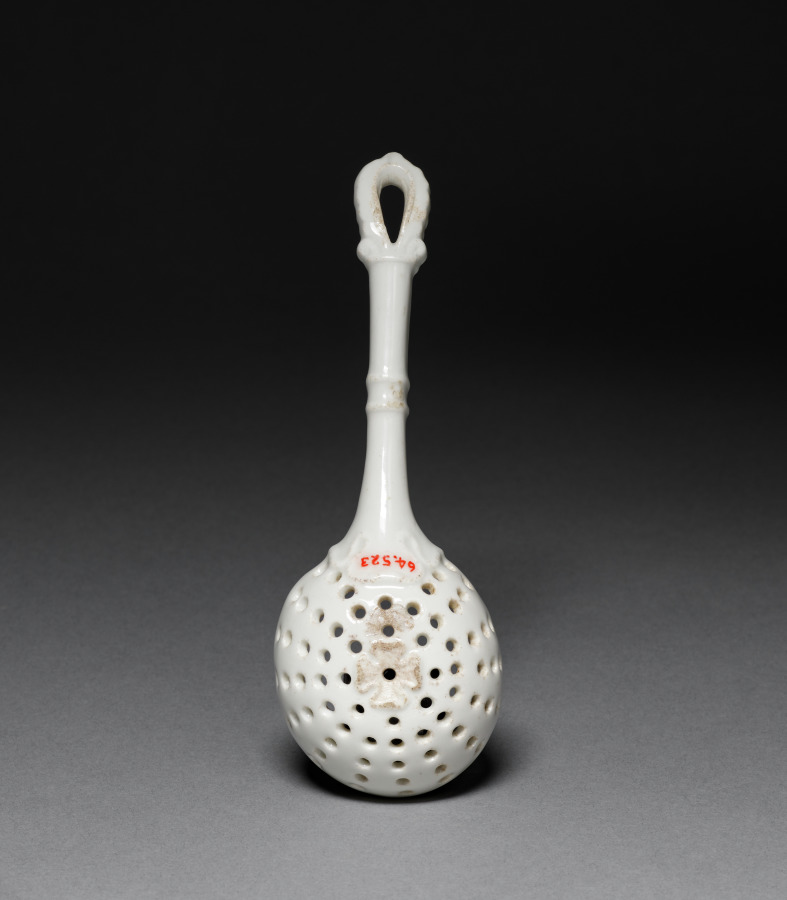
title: Sugar Spoon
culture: France, 18th century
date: c. 1780 ?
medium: soft-paste porcelain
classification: Ceramic